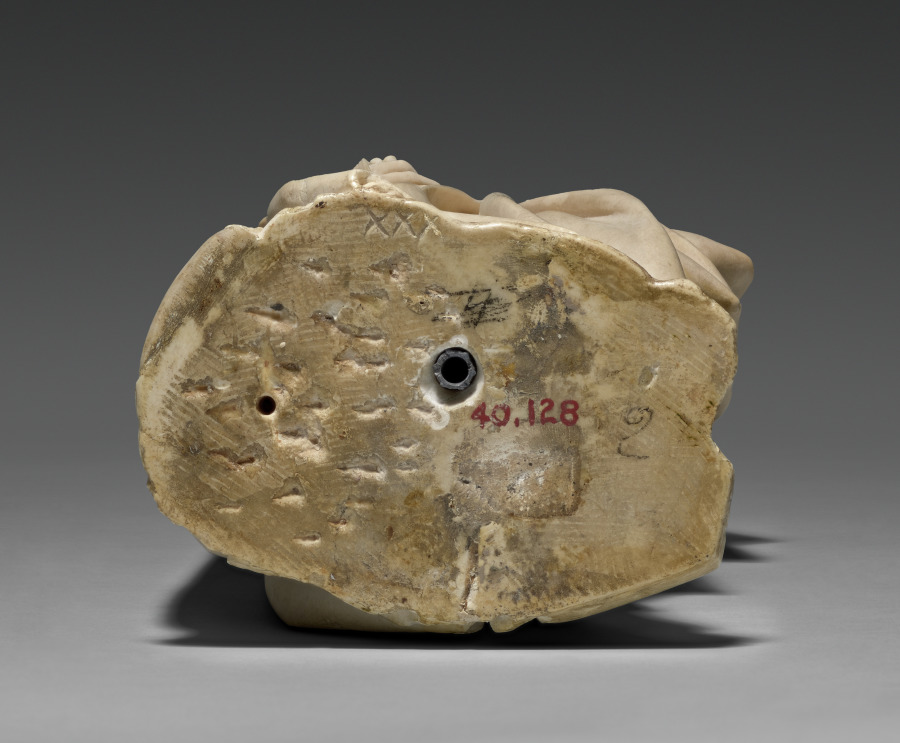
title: Mourner from the Tomb of Philip the Bold, Duke of Burgundy (1364–1404)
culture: Netherlands, active Dijon, 15th century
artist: Claus de Werve (Netherlandish, 1380–1439)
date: 1404–1410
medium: vizille alabaster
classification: Sculpture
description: This figure comes from the tomb of Duke Philip the Bold from the church of Champmol near Dijon (Burgundy, France). Philip, who founded the monastery and designated it as his burial place, hired the best artists, many of whom came from the Netherlands. While the commission was given in 1381, the work was not completed until 1410, six years after the duke’s death. This mourner is unusual for the time because it is not carved as a static low relief on the pedestal of the tomb but interacts with the viewers and their fellow procession members. The lifelike quality of the figure is due in large part to the alabaster. Its softness allowed artists to carve details into the material, and the transparent, milky white stone could also be polished to a high gloss.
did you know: During his life, Duke Philip founded the monastery of Chartreuse de Champmol to serve as a final resting place for himself and his family.